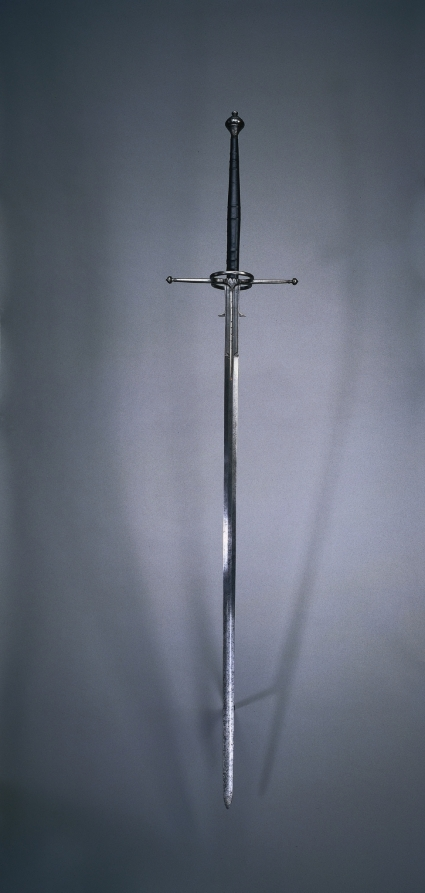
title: Two-Handed Sword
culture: Spain, Toledo (?), second half of 16th Century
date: 1550–1600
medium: steel, wood and leather grip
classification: Arms and Armor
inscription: IVLIAN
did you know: This Spanish sword is meant to be brandished with two hands, used by a combatant on foot rather than on horseback. Imagine the weight of this sword in your hands.